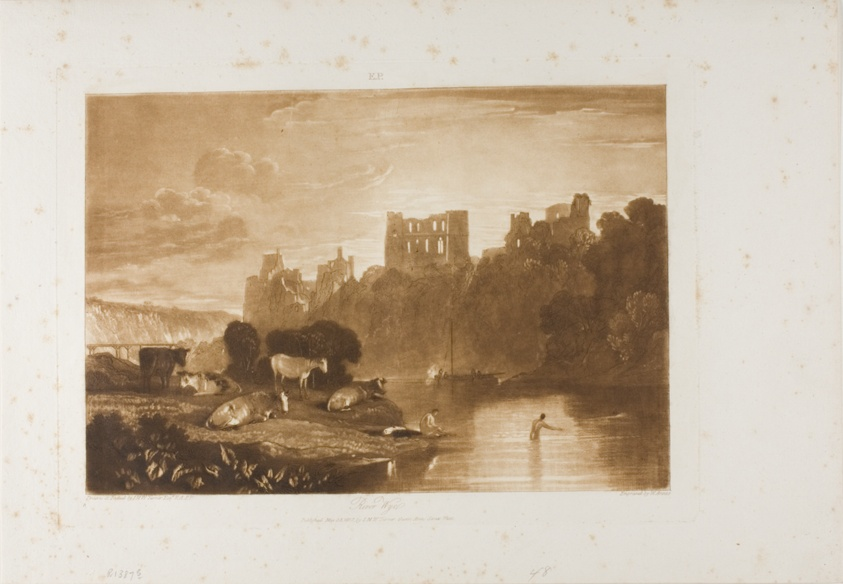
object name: Print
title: River Wye, plate 48 from Liber Studiorum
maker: Joseph Mallord William Turner (English, 1775-1851); Engraved by W. Anis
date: published May 23, 1812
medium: Etching and engraving in brown on ivory laid paper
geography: England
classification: etching; print; prints and drawing